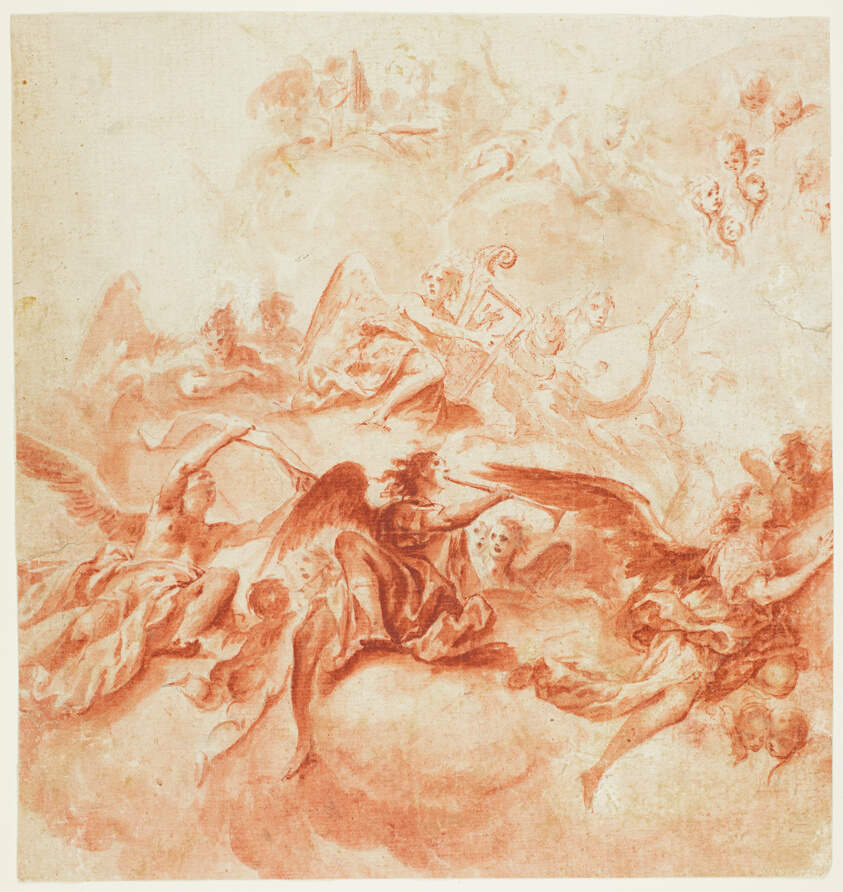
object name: Drawing and Watercolor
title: Music-Making Angels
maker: Possibly attributed to Vittorio Maria Bigari (Italian, 1692-1776); or Giacomo Guerrini (Italian, 1718-1793)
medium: Red chalk, with brush and red chalk wash, over traces of black chalk, on ivory laid paper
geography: Italy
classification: drawings (visual works); prints and drawing